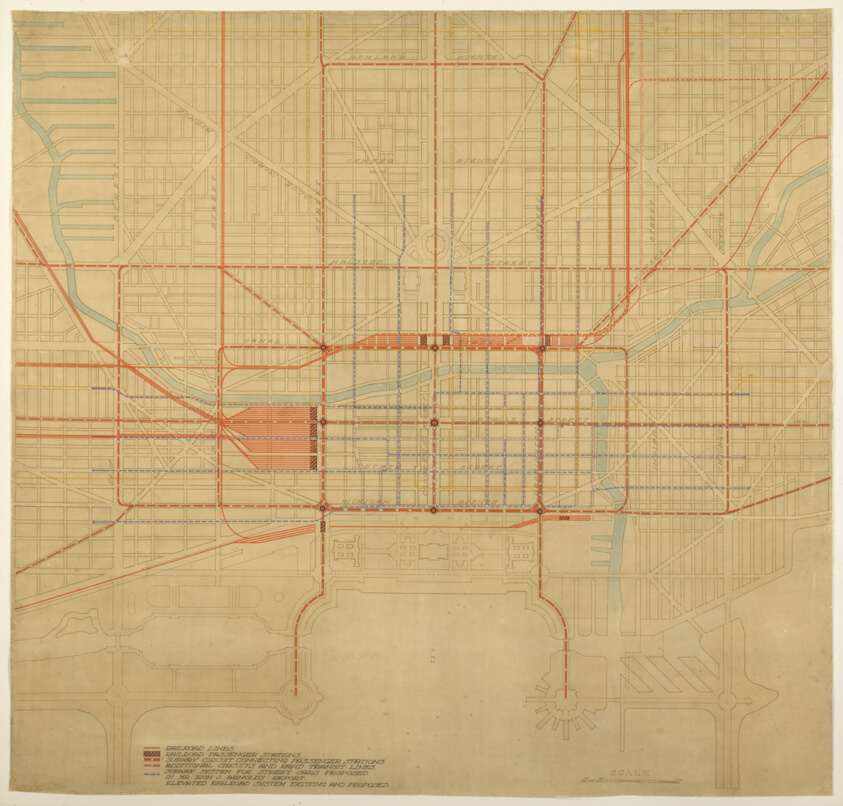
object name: Architectural Drawing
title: Plate 80 from The Plan of Chicago, 1909: Chicago. Diagram of City Center, Showing the Proposed Arrangement of Railroad Passenger Stations, the Complete Traction System, Including Rapid Transit, Subway, and Elevated Roads, and the Circuit Subway Line.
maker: Daniel Hudson Burnham, American, 1846-1912; Edward Herbert Bennett, American, born England, 1874-1954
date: 1909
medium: Colored ink and paint on a printed map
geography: Chicago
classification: architectural drawing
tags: Chicago, architecture